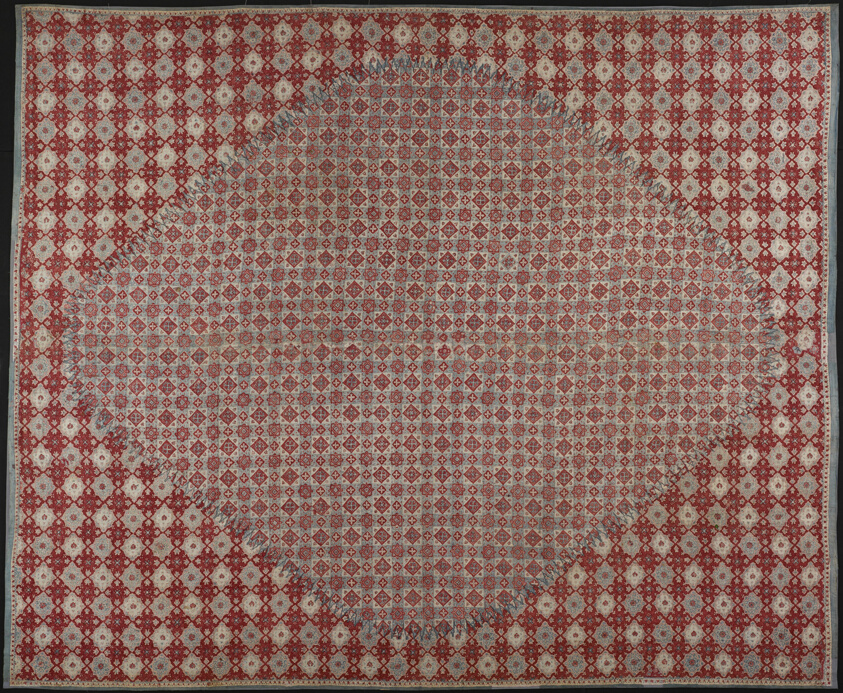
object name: Religious/Ritual Object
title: Ceremonial Skirt Cloth (dodot)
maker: India, Coromandel Coast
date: late 17th/18th century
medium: Cotton, plain weave; resist and mordant dyed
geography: India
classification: textile; weaving - printed; ritual objects